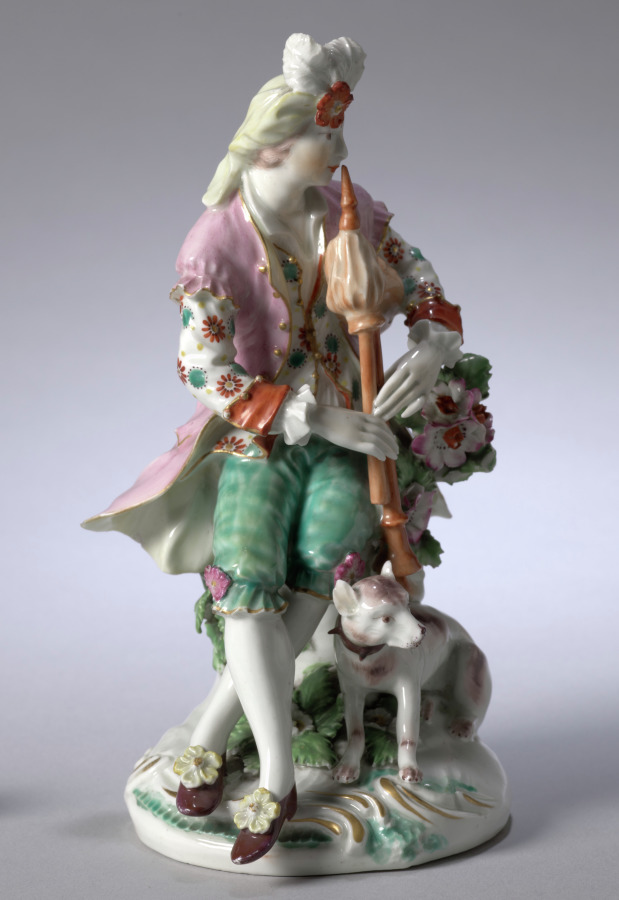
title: Seated Musician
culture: England, Derby, 18th century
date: c. 1765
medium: soft-paste porcelain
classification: Ceramic